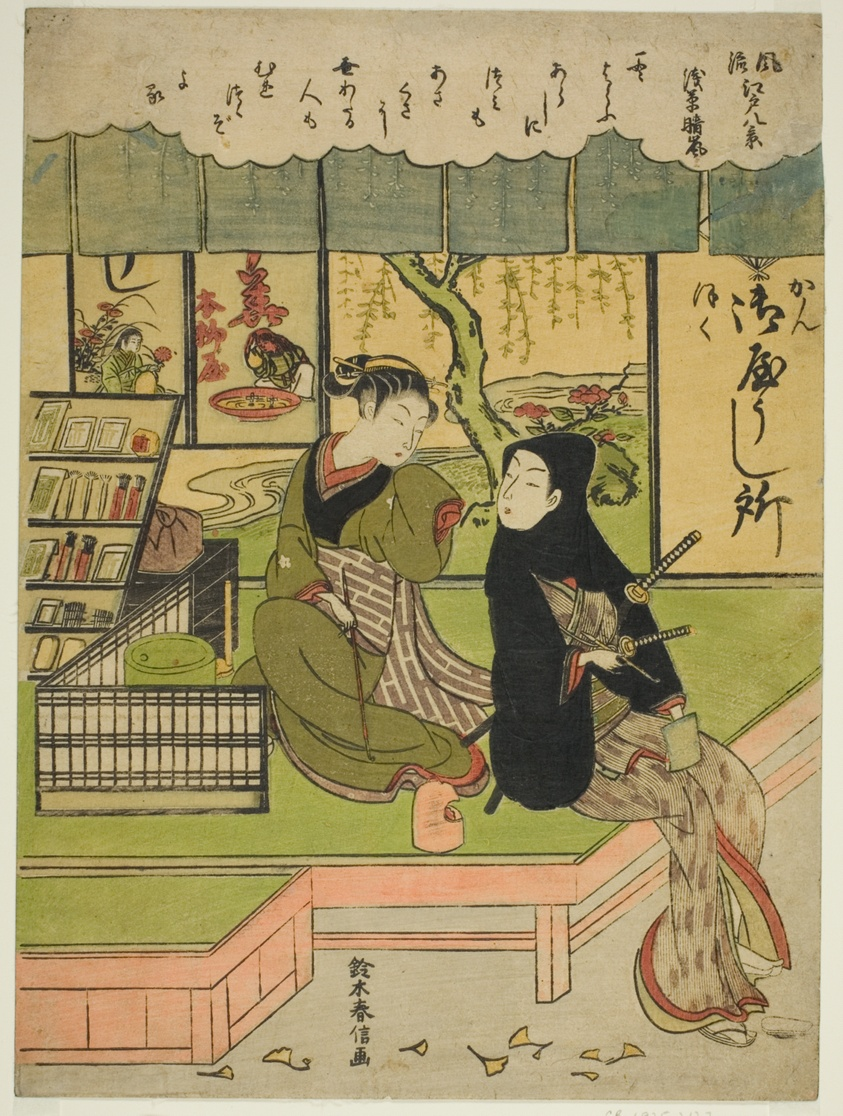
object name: Print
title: Clearing Weather at Asakusa (Asakusa no seiran), from the series "Eight Fashionable Views of Edo (Furyu Edo hakkei)"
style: Japanese (culture or style)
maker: Suzuki Harunobu 鈴木 春信; Japanese, 1725 (?)-1770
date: c. 1768/69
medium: Color woodblock print; chuban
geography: Japan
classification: woodblock print; print; asian art